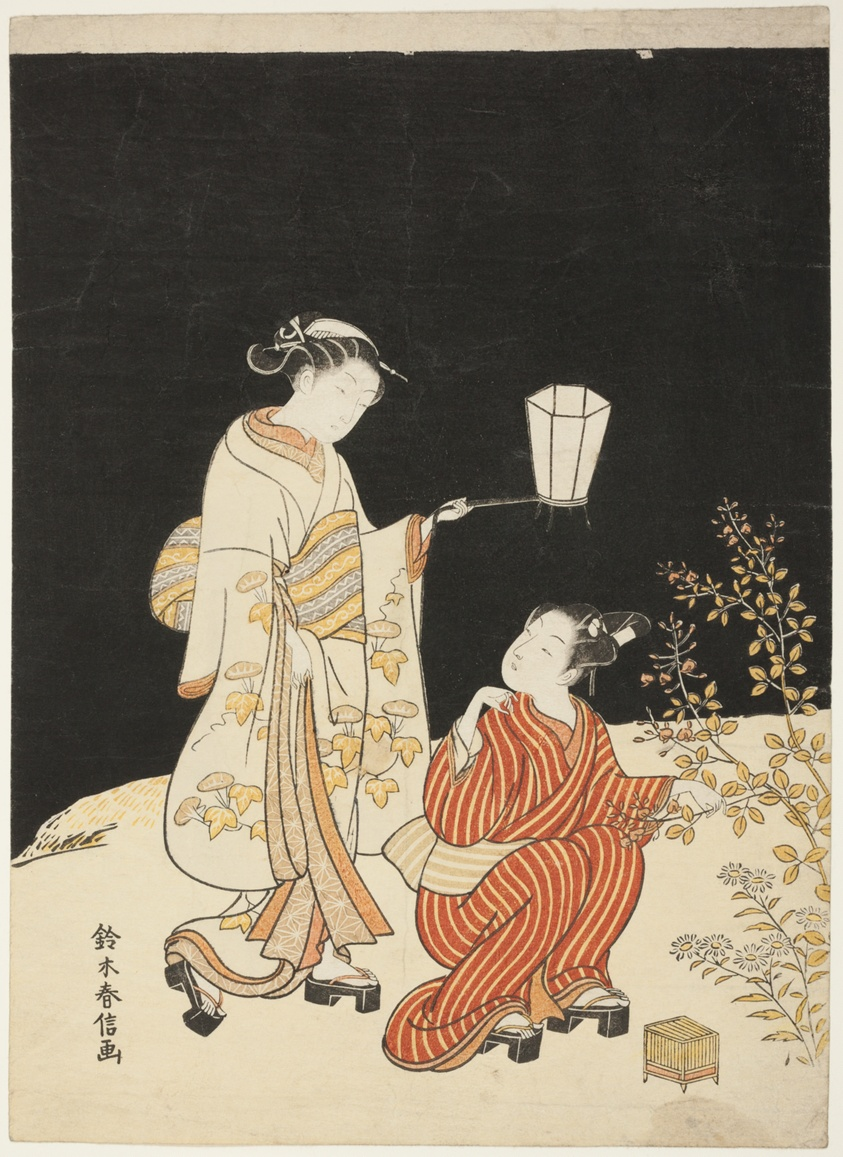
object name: Print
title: Searching for Fireflies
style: Japanese (culture or style)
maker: Suzuki Harunobu 鈴木 春信; Japanese, 1725-1770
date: 1768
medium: Color woodblock print, chūban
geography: Japan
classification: woodblock print; print; asian art